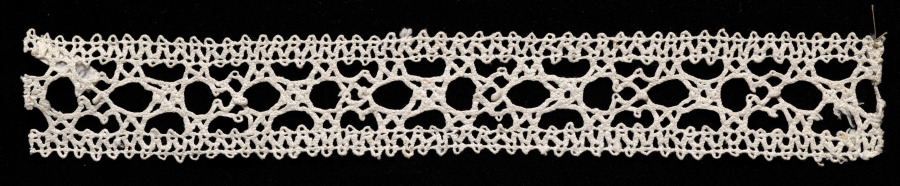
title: Lace Insertion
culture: Italy, Venice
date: 1540–60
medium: Bobbin lace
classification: Lace